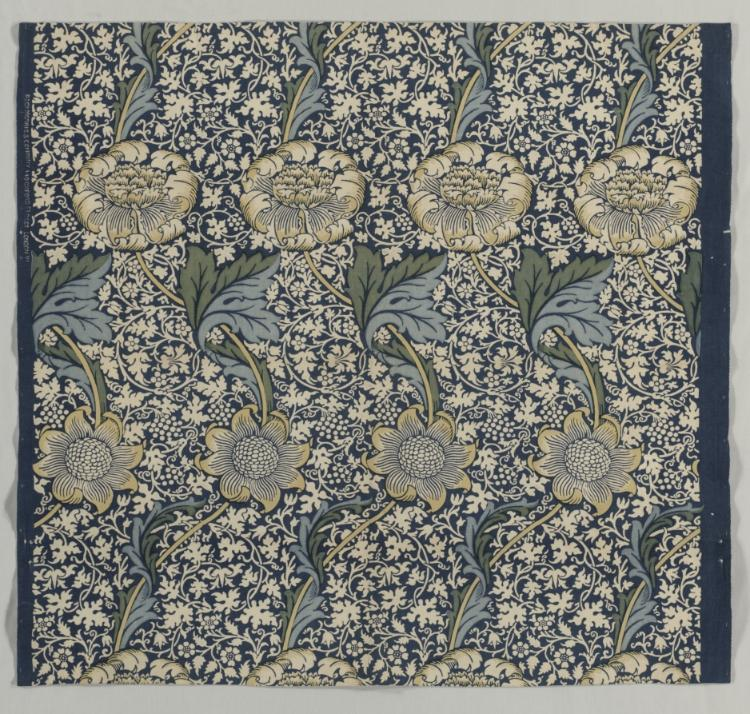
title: Kennet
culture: England, Merton Abbey, 20th century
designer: William Morris (British, 1834–1896)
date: c 1920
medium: plain weave cotton, printed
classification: Textile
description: Morris said that he used the South Kensington Museum (now the Victoria & Albert Museum) more than anyone alive. As one of the most knowledgeable textile historians of his day, Morris filtered his love of nature through the lens of history. Later textiles with strong diagonal orientation, such as Kennet, show a debt to the centuries-old Italian cut velvet that he had studied. Named after a river in the south of England that flows into the Thames, Kennet is an example of one of his patterns that could be purchased in a variety of colors and fabrics, including cotton, velveteen, silk, and Madras muslin, creating limitless possibilities to appeal to consumers’ needs and tastes.